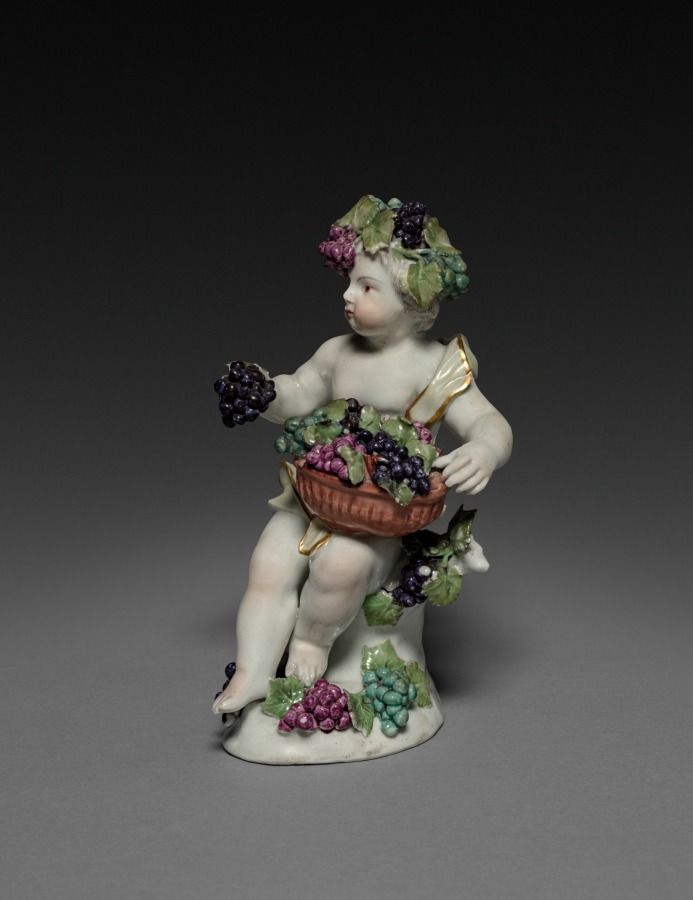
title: Autumn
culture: England, Derby, 18th century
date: c. 1760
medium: soft-paste porcelain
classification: Ceramic